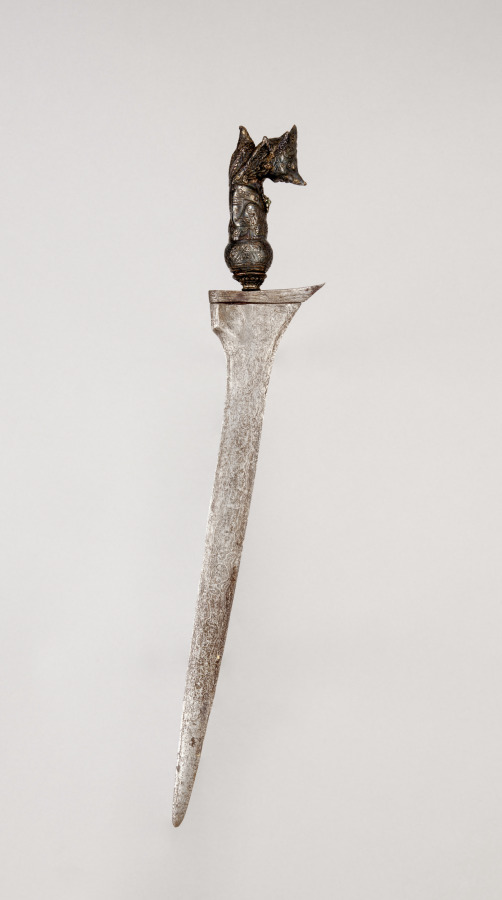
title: Sword (Kris)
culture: Java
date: 1800s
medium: iron and silver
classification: Arms and Armor